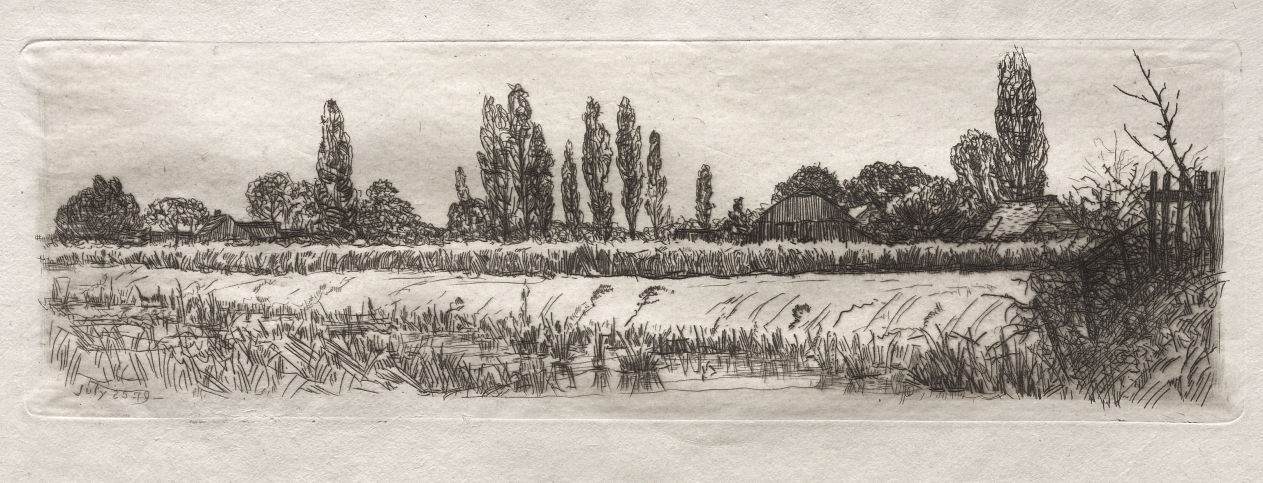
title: Cornfield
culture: America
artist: Otto H. Bacher (American, 1856–1909)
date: 1879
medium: etching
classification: Print